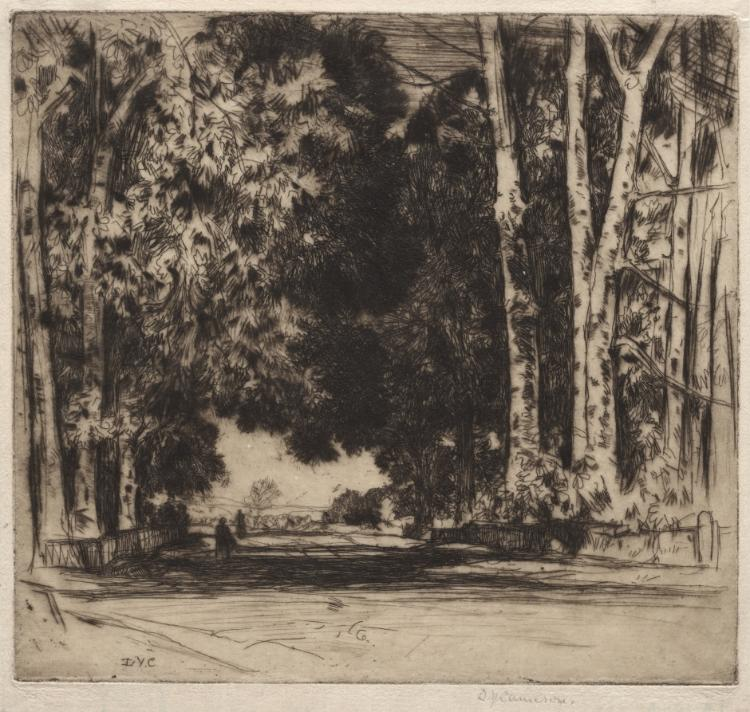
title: The Avenue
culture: England, 20th century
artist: David Young Cameron (British, 1865–1945)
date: 1905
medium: etching and drypoint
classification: Print